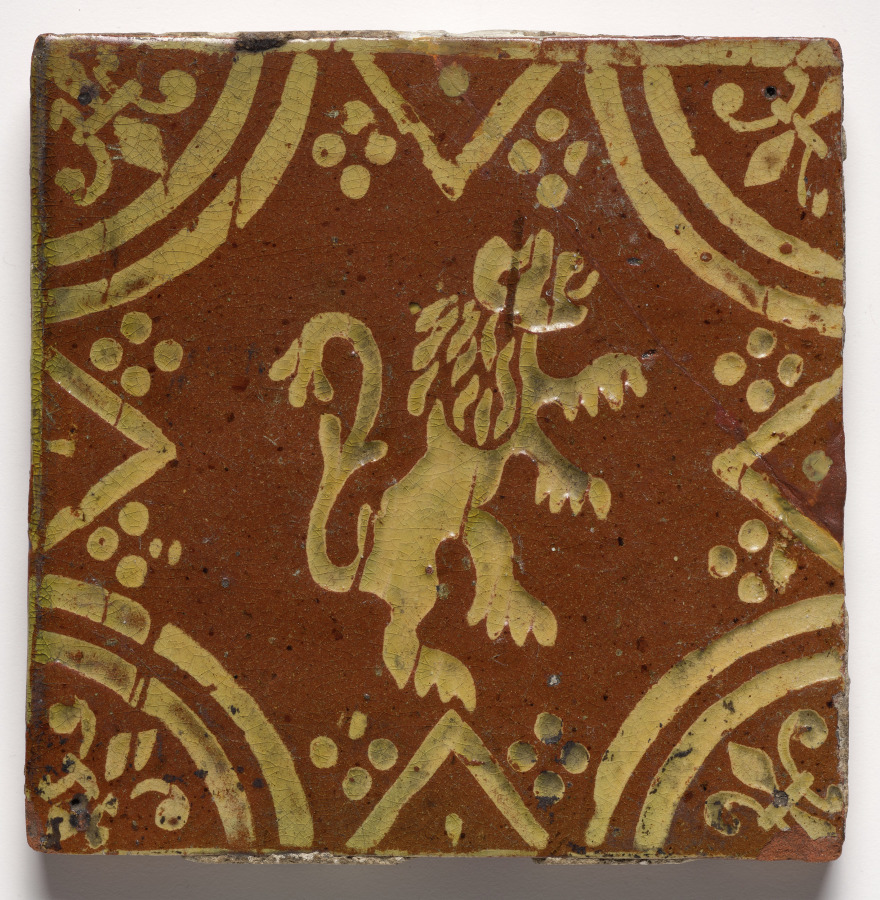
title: Tile- Rampant Lion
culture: Netherlands, Holland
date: c 1600s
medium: glazed ceramic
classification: Ceramic